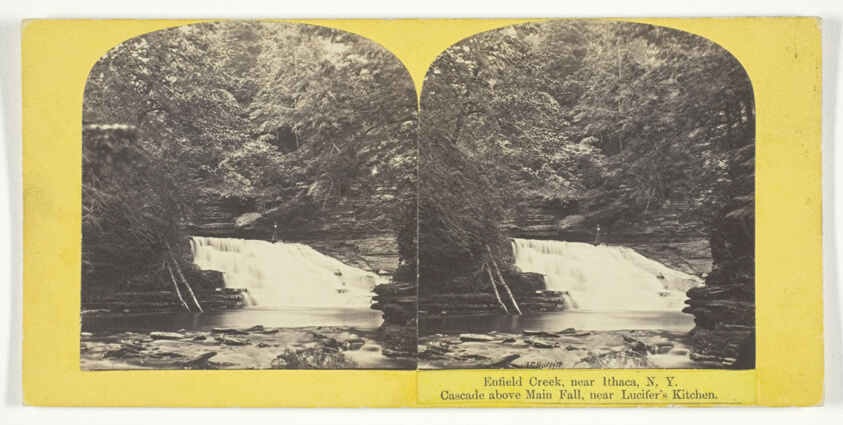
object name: Photograph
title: Enfield Creek, near Ithaca, N.Y. Cascade above Main Fall, near Lucifer's Kitchen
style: 19th century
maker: J. C. Burritt; American, active 1860s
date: 1860/65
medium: Albumen print, stereo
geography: Ithaca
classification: photography; photograph; albumen silver print; stereograph (albumen)